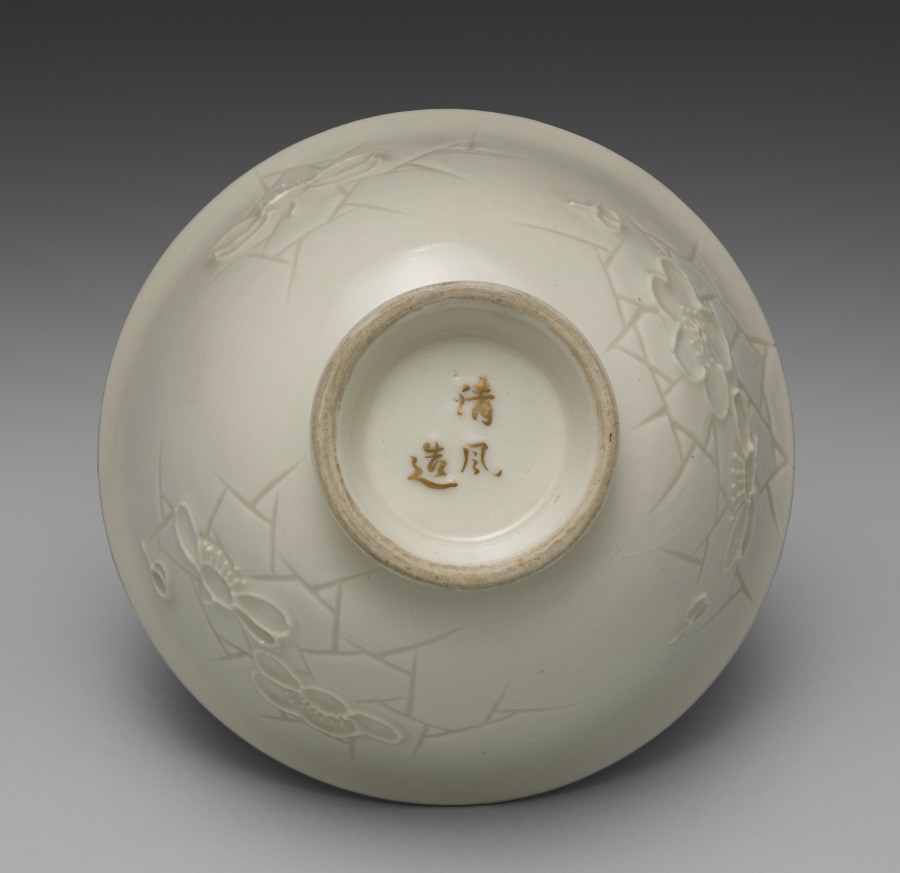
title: Bowl from Dining Set with Plum Blossoms and Cracked-Ice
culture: Japan, Meiji period (1868–1912)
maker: Seifū Yohei II (Japanese, 1844–1878)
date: c. 1875–78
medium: Porcelain with molded designs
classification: Ceramic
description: Each item in this set has a delicate low-relief design of flowering plum branches over scattered, intersecting lines meant to resemble the cracked-ice surface of a frozen body of water and is signed on the base in gold pigment. While Yohei II produced many fine works in underglaze blue, like those produced by Kiyomizu Shichibei, he also made works in quite different styles later in his career, from the early 1870 s. In 1873, he was appointed purveyor to the Industrial Center of Kyoto Prefecture, a designation associated with Kyoto’s efforts to reach an international market through the port of Kobe; and from 1875 until his death, he was involved in national-level projects to present Japanese ceramics across the world. It was during this period that Yohei III was apprenticed to Yohei II, and it has been suggested that this set may in fact be an early example of Yohei III’s work, which he signed with his teacher’s name. Decorated with flowers resembling Japanese textile motifs, the set calls to mind the design of Yohei II’s pair of vases with plum blossoms in the Victoria and Albert Museum. Here, the elaborate trees created for a formal public exhibition setting have been translated into the approachable blossoms of the genteel domestic environment. While the designs are consistent across the pieces, each raised flower petal and pistil and each incised line in the ice was done by hand, so the cups, bowls, and dishes are similar yet unique. The bottoms of two boxes once identified the set’s owner, but the information has been deliberately obscured with black ink. However, inscriptions still visible appear to indicate two occasions, once at the end of July 1886 , and once again in June 1916 , when parts of the set were requested from Hokura in Niigata Prefecture. The location corresponds to a neighborhood in the present-day city of Jōetsu. The surname Tsuji 辻 also appears on a paper tag affixed to one of the box cloths. Future research may possibly reveal more about their provenance. A vase by Yohei III in a private collection combines the formal grandeur of the Yohei II vases in the Victoria and Albert Museum with the gentler design of this dining set, placing flowering plum trees against soft, scalloped-edge clouds resembling those in golden screens.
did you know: The dining wares have a creamy white coloration that the four boxes containing them identify as Korean in style.